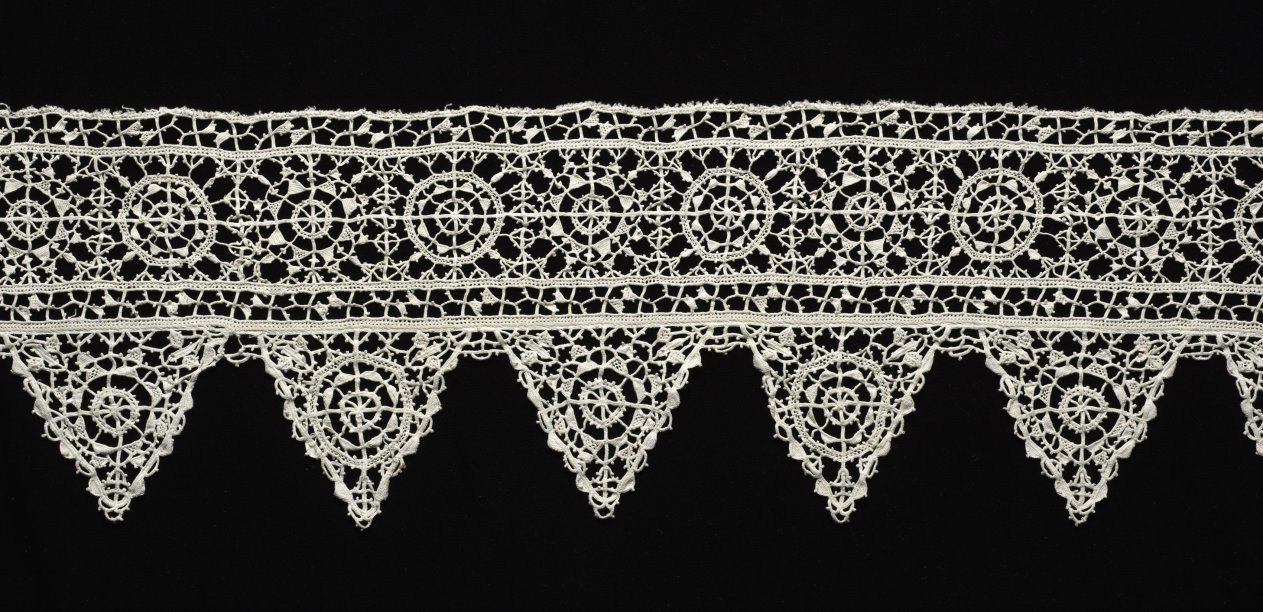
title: Lace Fragment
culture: Italy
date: 1500s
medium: Needle lace (reticella) insertion and edging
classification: Lace